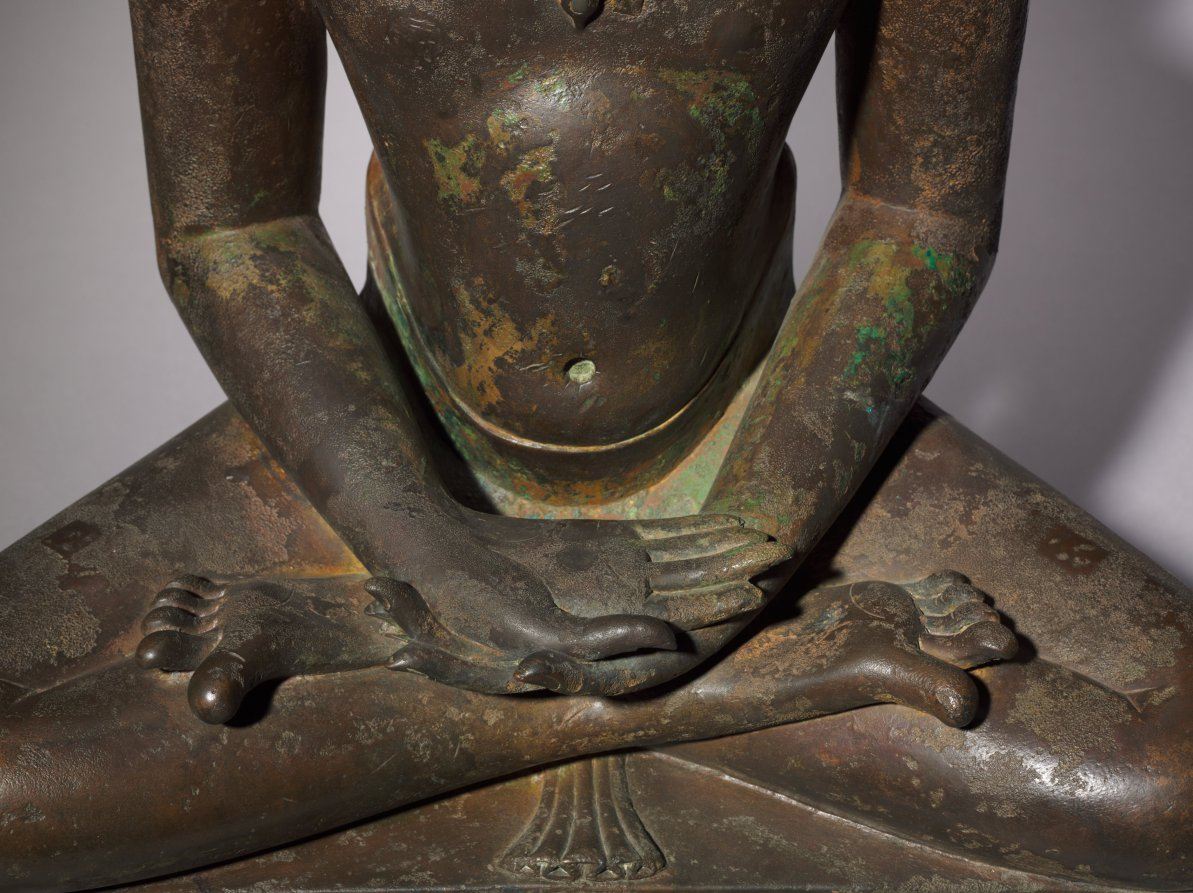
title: Jina (Tirthankara)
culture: India, Rajasthan, Medieval period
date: 900s–1000s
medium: bronze with silver inlay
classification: Sculpture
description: Jainism was one of the three major religions to evolve in India, the other two being Hinduism and Buddhism. While each religion developed its own particular characteristics, their beliefs maintained a common ground with Hinduism. In both Jainism and Buddhism, deities symbolize enlightened beings whose example is meant to inspire believers in following the path toward salvation rather than worshipping them. In Jainism the most common deities are Jinas (meaning "liberators" or "victors"), also known as Tirthankaras ("holy men"). As the name implies, they are beings "liberated" through enlightenment from the cycle of rebirth. There are 24 of these Jain patriarchs. This sculpture represents one of the 24 Jinas, but the absence of attributes makes it impossible to determine which one. This is not surprising since Jinas tend to look alike. Although this figure wears a cloth around his waist, Jinas are usually shown naked—a reference to their renunciation of worldly goods—and seated cross-legged in the posture of meditation (dhyanasana) with their hands resting in their laps (in the dhyana mudra), palms turned upward. Their physical appearance is always the same: broad shoulders, tapering torso, and long, highly stylized limbs. The head, with its round face and short-cropped curls, has a small protrusion at the top. The facial expression conveys self-assurance, wisdom, and compassion. Such a figure would usually have a halo attached to the back of the head. The present bronze dates to a time when some of the finest Jain sculptures and monuments were produced in India, as documented by such temples as Mt. Abu in Rajasthan (the area where this sculpture originated), Khajuraho in Madhya Pradesh, or Srivana Belgola in Karnataka.